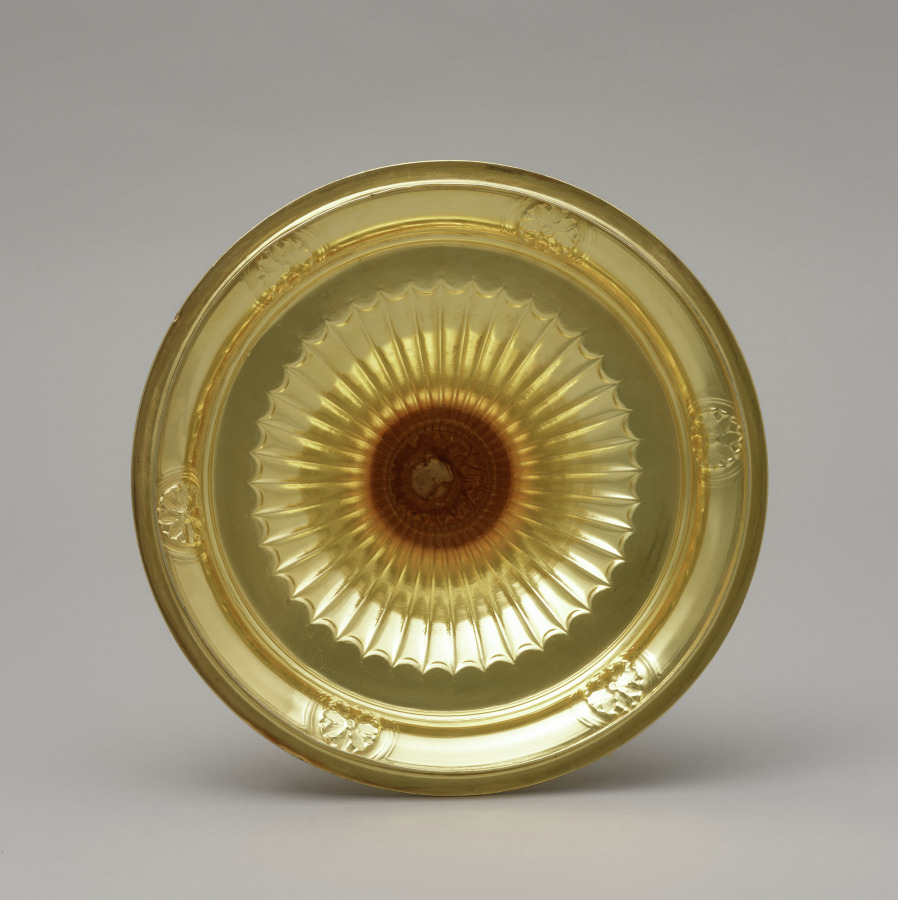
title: Cover for a Trophy Cup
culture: England, 18th century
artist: firm of Peter Bateman (British, 1740–1825)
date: 1792–93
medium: silver gilt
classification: Silver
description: Silver fulfilled a prominent role in projecting wealth, status, power, and ritual in British life during the 1600s and 1700s. Elaborate forms such as the trophy that accompanies this lid, with its swags of flowers, neoclassical rosettes, and acanthus spears, not only represented wealth in its sheer silver weight but also provided royal and aristocratic owners a surface for displaying engraved coats of arms. Engraved on one side of the trophy cup can be found the arms of Robert Grosvenor (1767–1845), the first Marquess of Westminster, and Lady Eleanor Egerton (1770–1846), whom he married in 1794, a year after the trophy’s completion. The other side depicts preparations for a horserace, the most culturally significant leisure activity enjoyed by aristocratic families in the 1700s. Grosvenor owned a number of famous horses and was likely awarded this trophy following a successful race.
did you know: This is a lid to a trophy cup. See cover record.